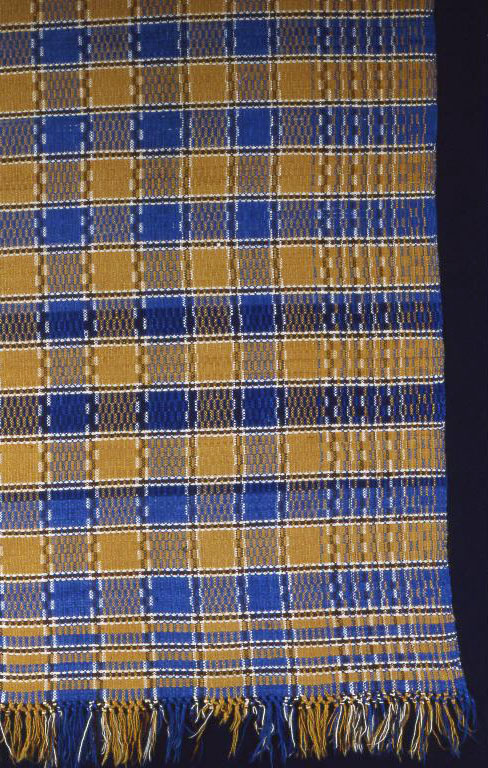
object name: Textile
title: Coverlet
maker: United States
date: 1820s/30s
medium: Wool, plain weave with supplementary patterning wefts (overshot) and knotted main warp fringe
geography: United States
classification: textile; coverlet; weaving - coverlet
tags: coverlet